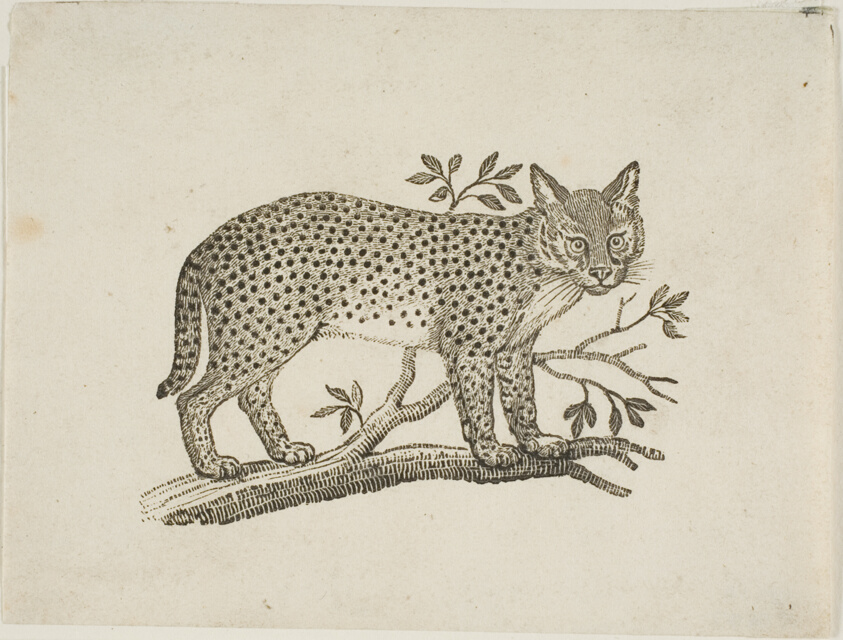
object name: Print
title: The Serval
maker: Thomas Bewick (English, 1753-1828)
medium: Woodcut on ivory wove paper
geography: England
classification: wood engraving; print; prints and drawing